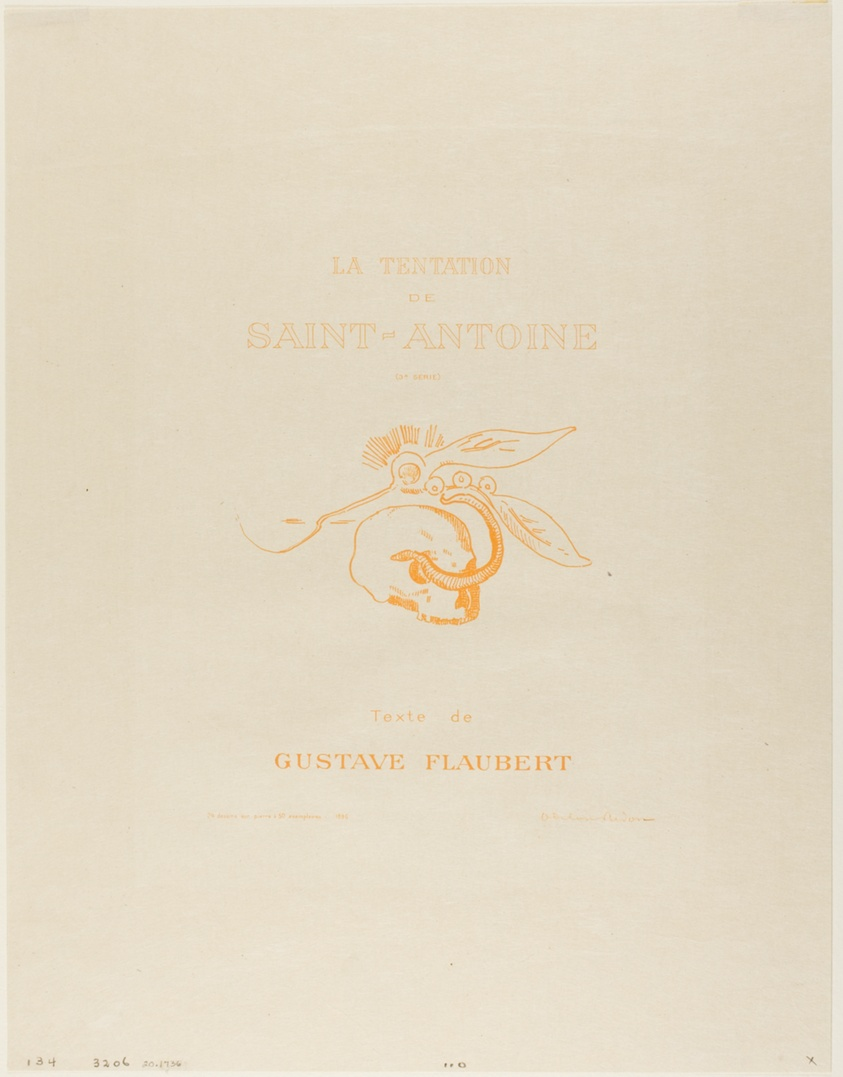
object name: Print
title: Frontispiece/Title Plate for the Tentation de St. Antoine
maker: Odilon Redon (French, 1840-1916)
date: 1896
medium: Lithograph printed in orange on cream Japanese paper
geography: France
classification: lithograph; print; prints and drawing; paper